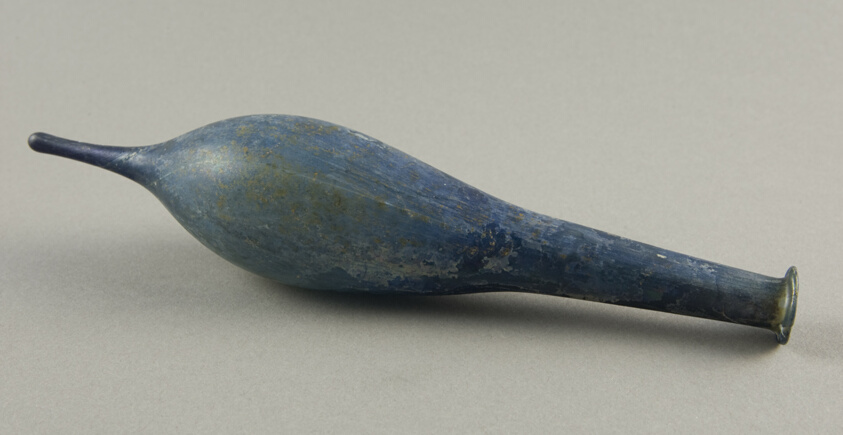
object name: Vessel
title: Bottle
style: ancient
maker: Ancient Mediterranean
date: 1st-2nd century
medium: Glass, blown technique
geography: Mediterranean Region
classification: bottle; glass; vessel; ancient art